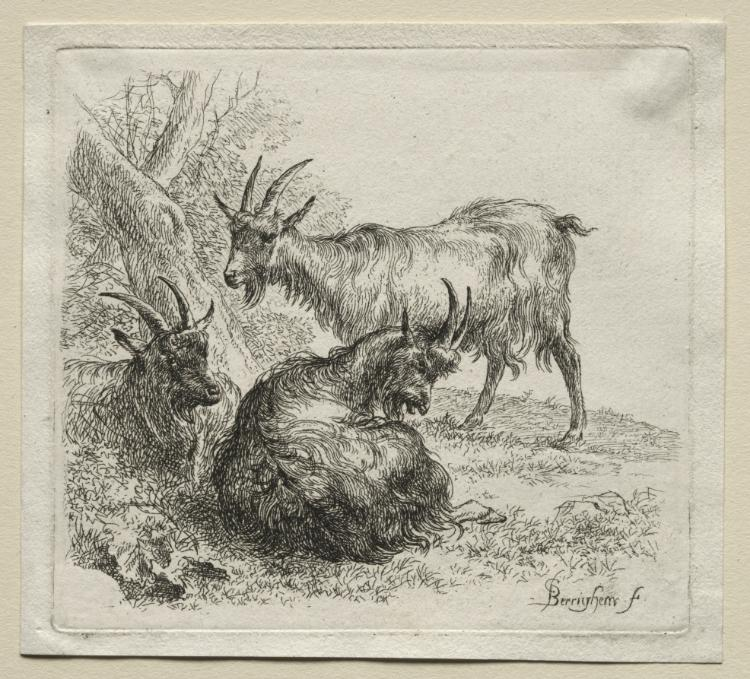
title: Animalia: Three Goats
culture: Netherlands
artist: Nicolaes Berchem (Dutch, 1620–1683)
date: 1635–83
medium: etching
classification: Print